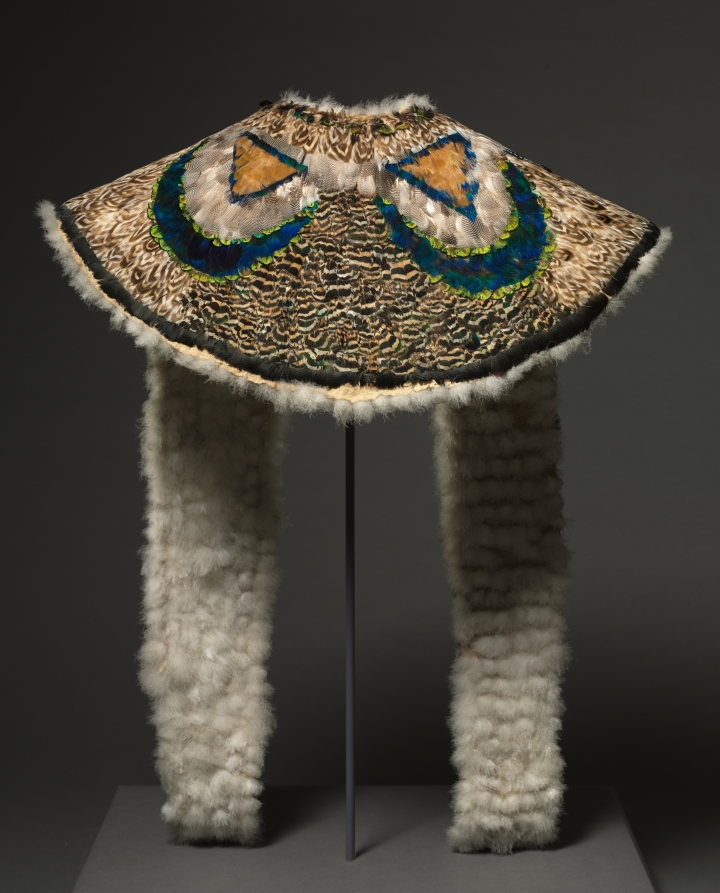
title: Pelerine (Collar or Cape)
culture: Northeastern Woodlands, Great Lakes/St. Lawrence River Region or Europe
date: c. 1830–1860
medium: Cotton, peacock feathers, guinea fowl feathers?, Gadwalls duck feathers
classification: Textile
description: Experts argue about collars of this type: Did a Great Lakes native artist make it, using as a model an English lady’s pelerine and exotic feathers obtained through trade? Or was the collar created by a European feather worker, perhaps after seeing the spectacular feather capes of native Hawaiian royals who visited England in 1824? There are arguments for both views—and for further research.